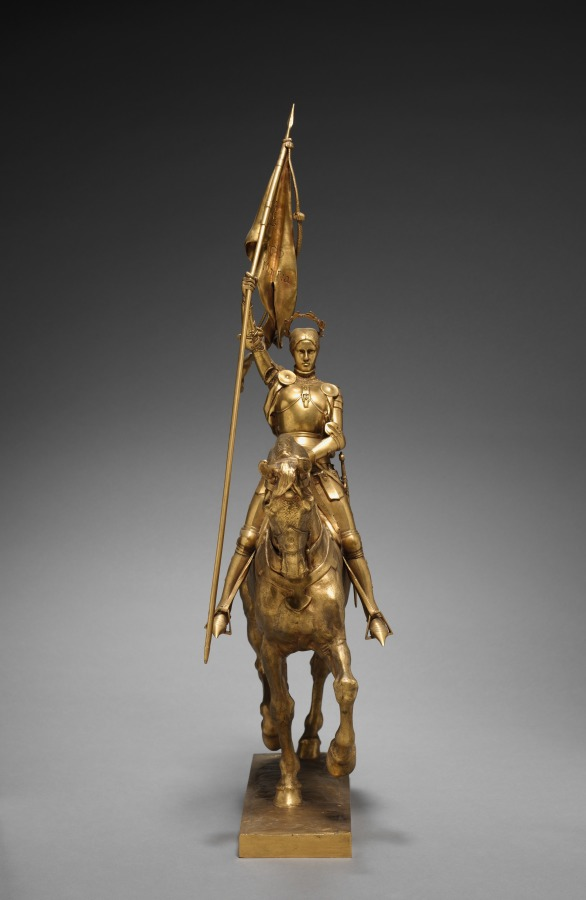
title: St. Joan of Arc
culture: France, 19th century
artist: Emmanuel Fremiet (French, 1824–1910)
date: 1874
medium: gilt bronze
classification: Sculpture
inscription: signed: "FREMIET"; inscription on flag: "IHS, MARIA."